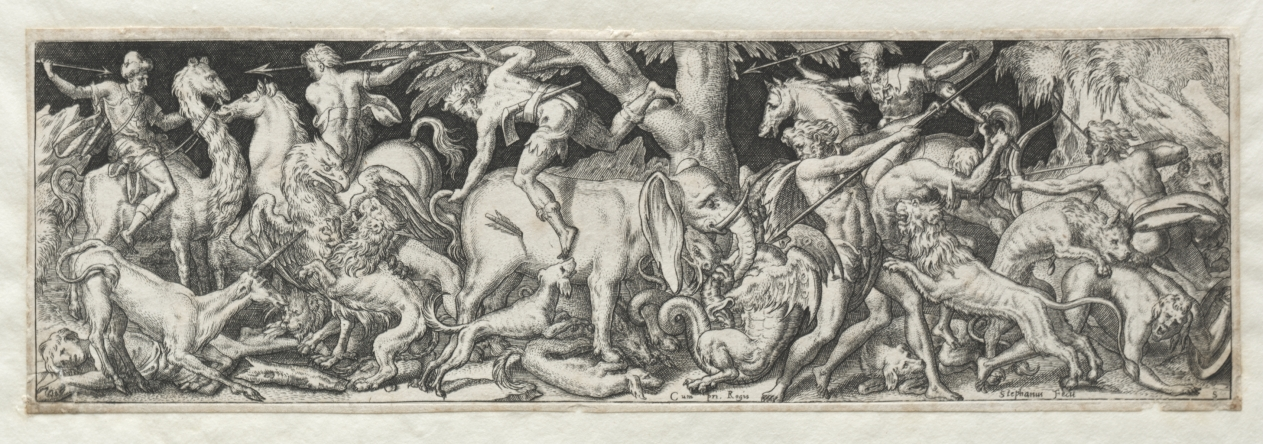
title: Combats and Triumphs No. 6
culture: France, 16th century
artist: Etienne Delaune (French, 1518/19-c. 1583)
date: c. 1550–72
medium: engraving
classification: Print